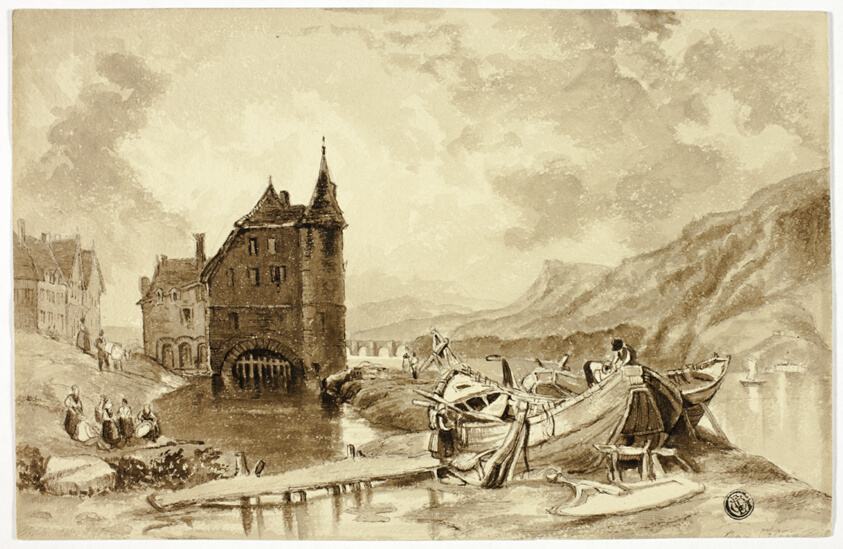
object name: Drawing and Watercolor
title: Fishing Boats Near Greves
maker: Elizabeth Murray (English, c. 1815-1882)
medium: Brush and brown wash on cream wove paper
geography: England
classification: ink or chalk wash; drawings (visual works); prints and drawing